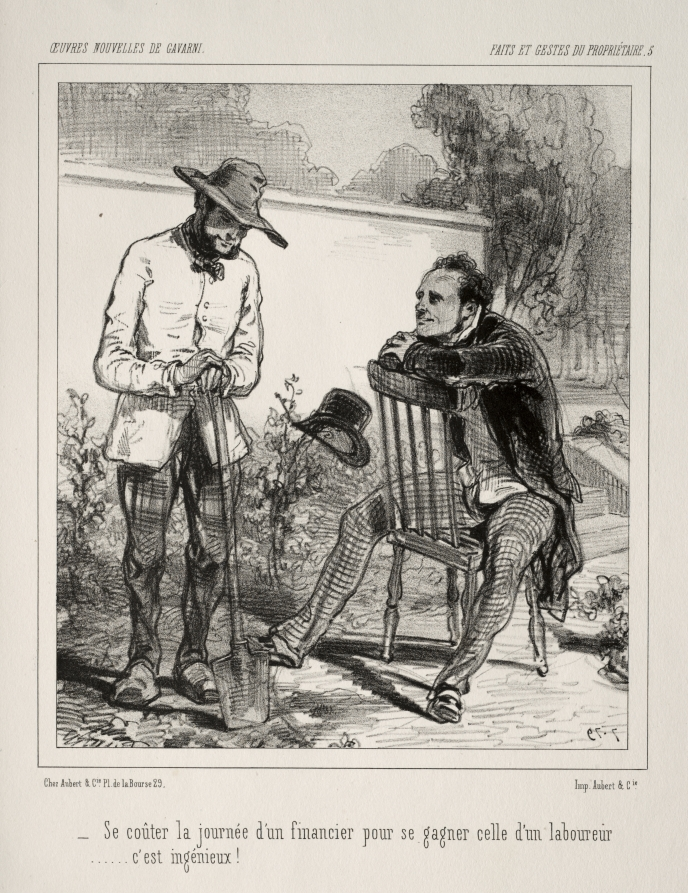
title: Faite et Gestes du Propriétaire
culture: France, 19th century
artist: Paul Gavarni (French, 1804–1866)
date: c. 1847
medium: lithograph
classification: Print